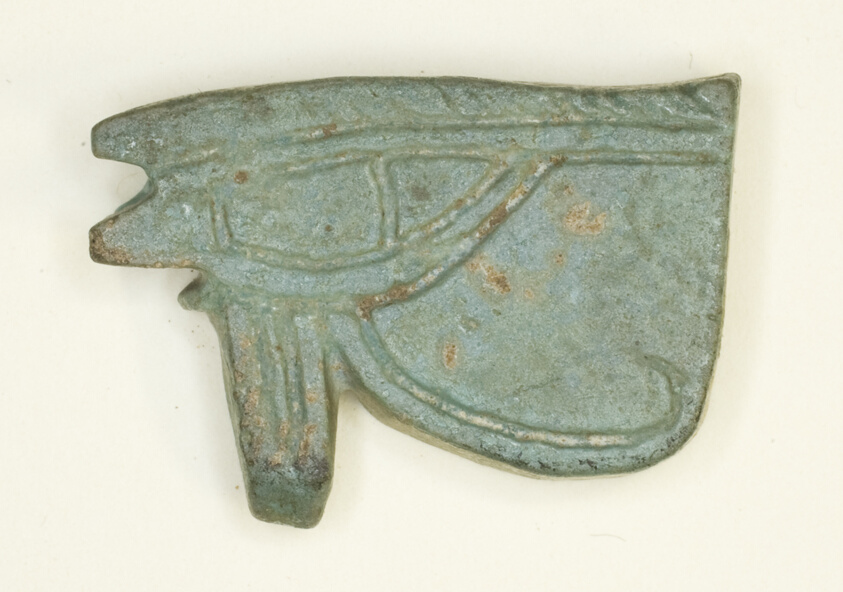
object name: Costume and Accessories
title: Eye of Horus (Wedjat) Amulet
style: late period (egyptian), egyptian, ancient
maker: Egyptian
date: Late Period, Dynasty 26–31 (664–332 BCE)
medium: Faience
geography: Egypt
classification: amulet; jewelry; ceramics; ancient art; costume; faïence (composite material)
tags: eye of Horus